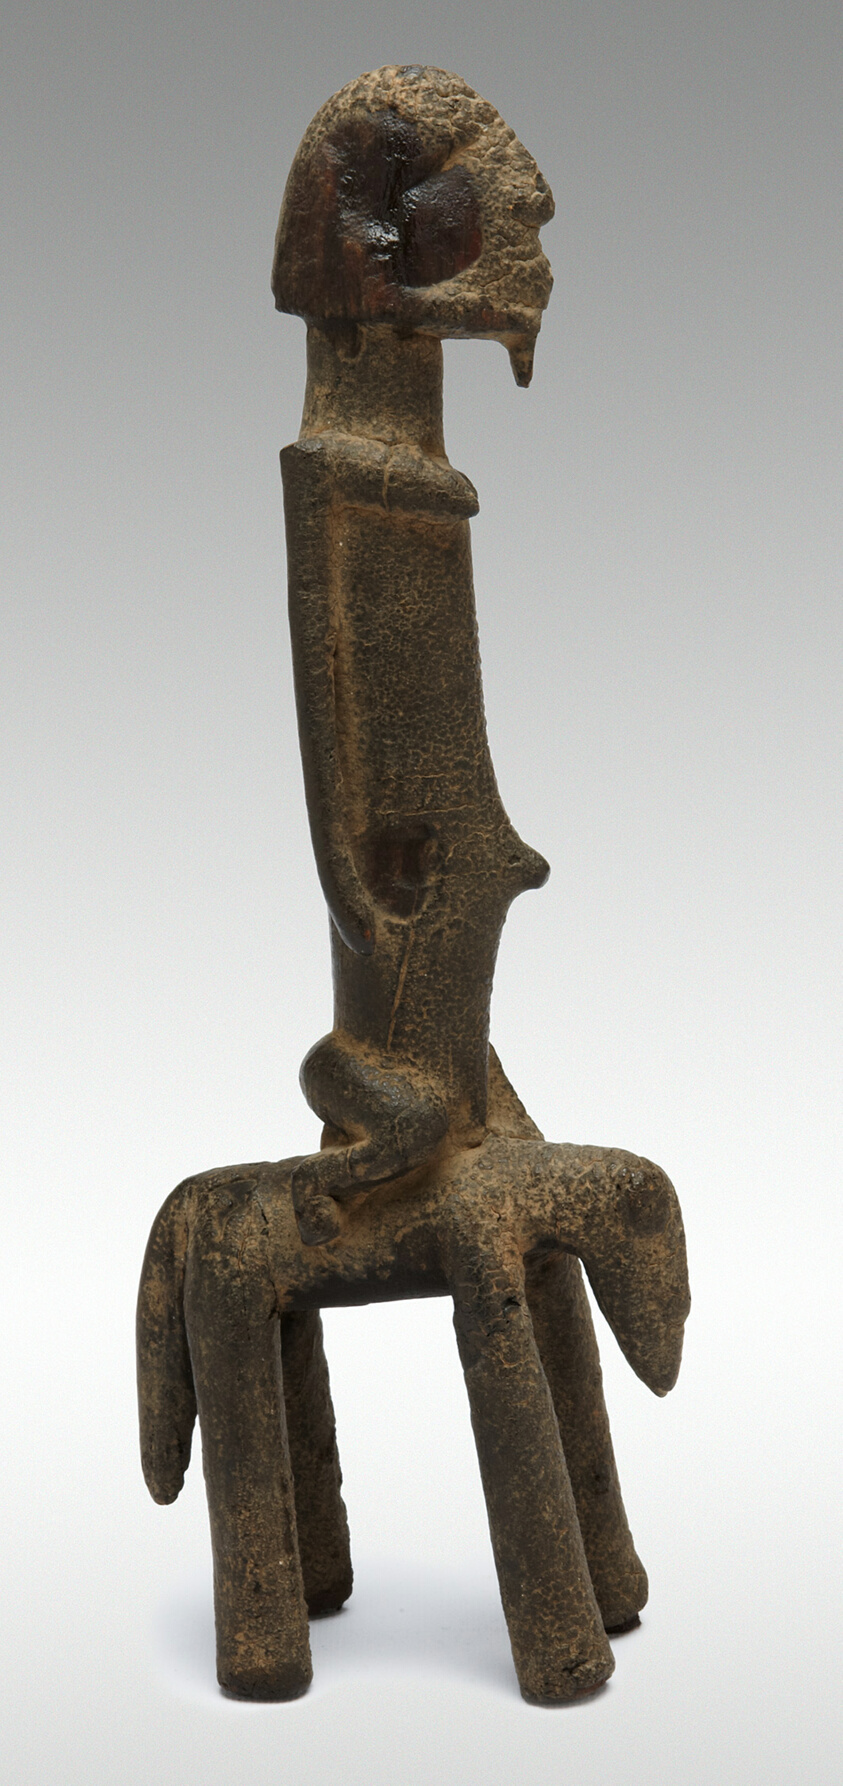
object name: Sculpture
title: Equestrian Figure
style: dogon, Arts of Africa, african Art, tellem, Northern Africa and the Sahel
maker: Dogon or Tellem; Bandiagara region, Mali; Northern Africa and the Sahel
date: 16th/19th century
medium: Wood and sacrificial material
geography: Mali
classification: sculpture; wood; arts of Africa; african art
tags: equestrian, animals, rider, horse